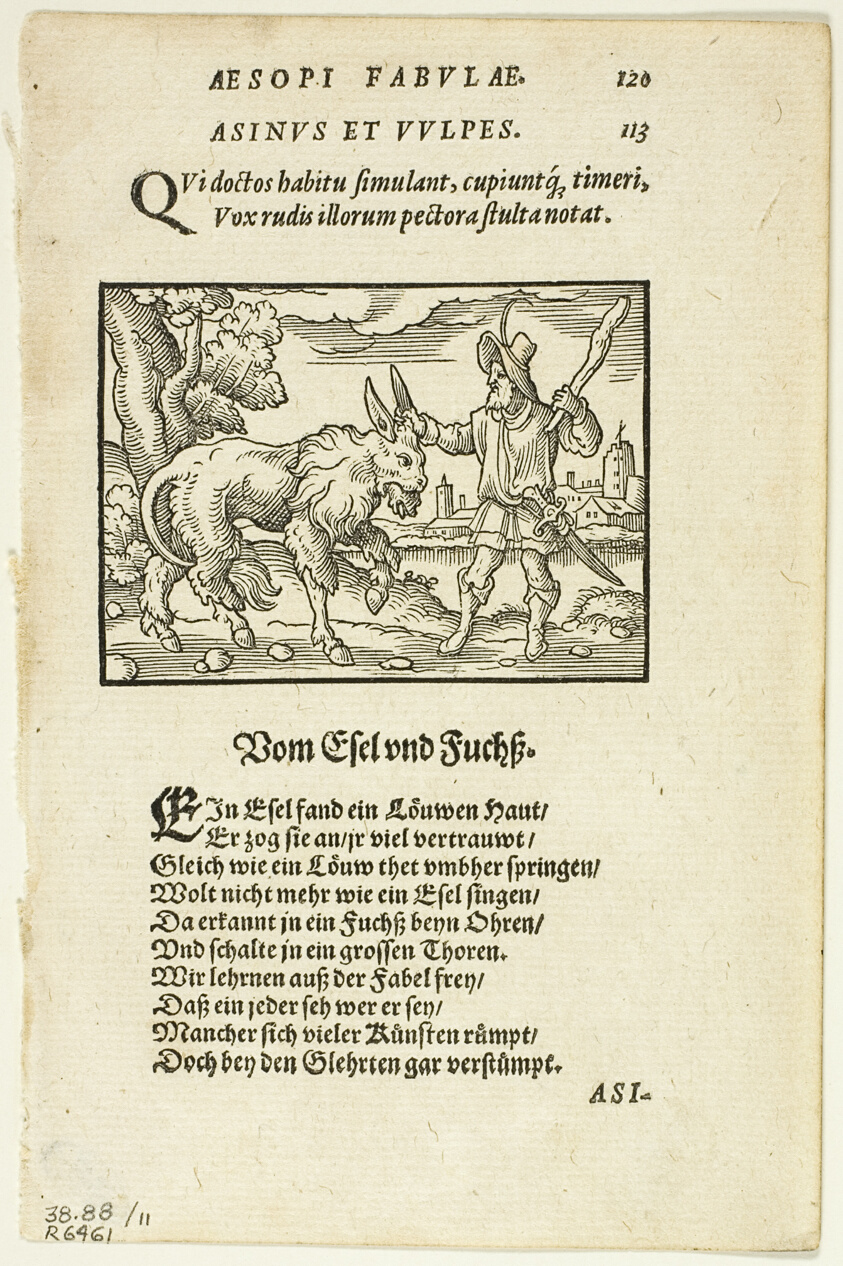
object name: Print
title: Schöne Figuren vor alle Fabeln Esopi (Aesop's Fables), plate eleven from Woodcuts from Books of the XVI Century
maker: Virgil Solis, the elder (German, 1514-1562); assembled by Max Geisberg (Swiss, 1875-1943)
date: 1566, assembled into portfolio 1937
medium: Woodcut on paper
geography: Germany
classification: woodcut; print; prints and drawing